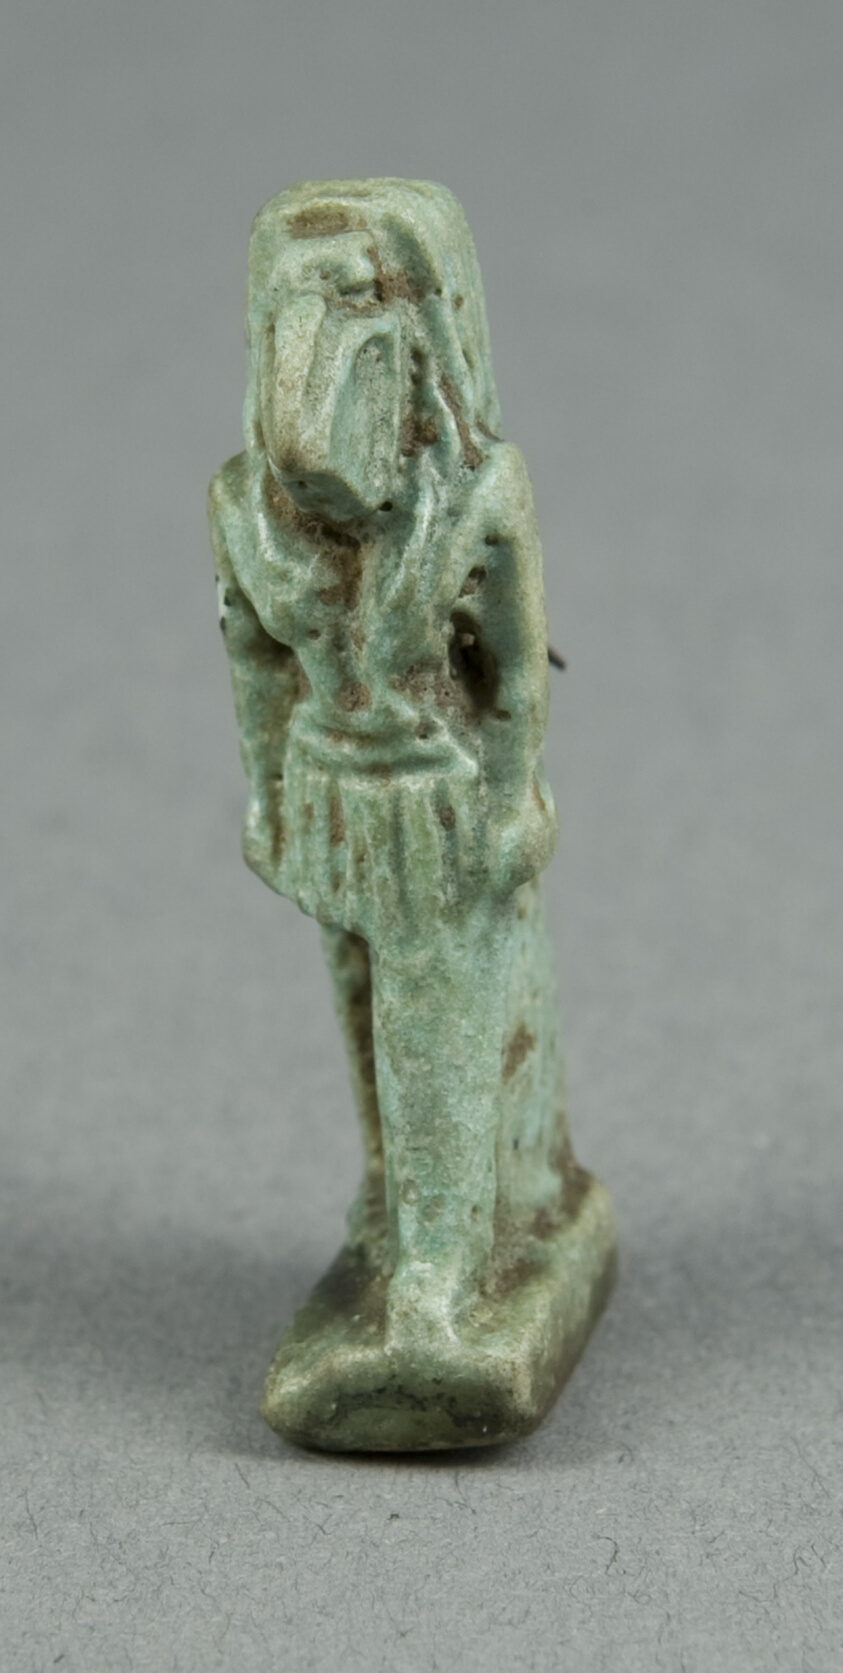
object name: Costume and Accessories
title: Amulet of the God Thoth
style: egyptian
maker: Egyptian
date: Late Period, Dynasties 26–31 (664–332 BCE)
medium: Faience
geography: Egypt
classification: amulet; jewelry; ceramics; ancient art; costume; faïence (composite material)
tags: gods (deities)